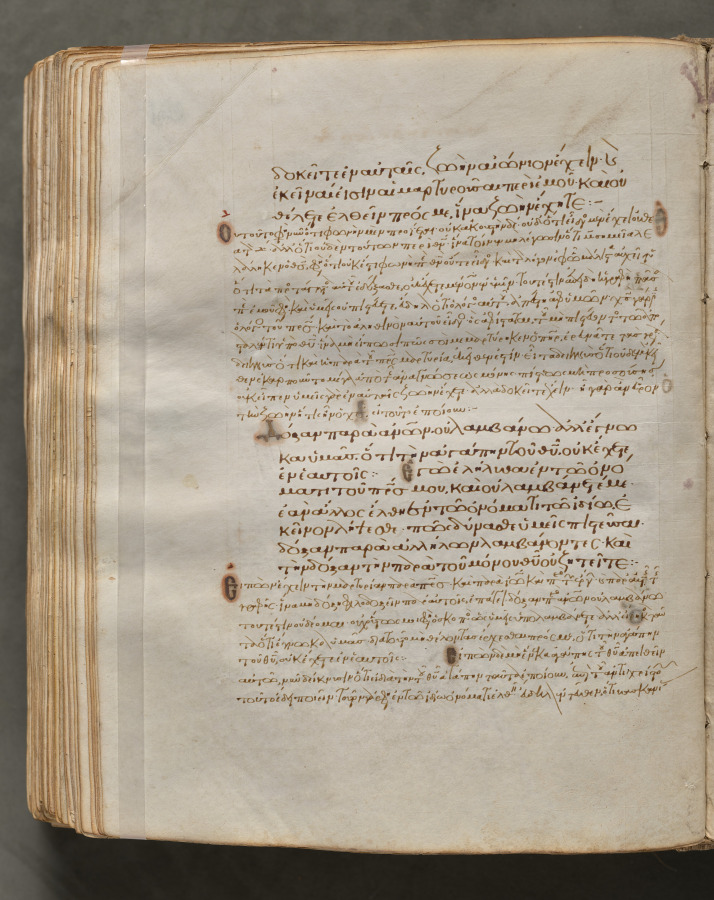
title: Text, folio 347 (verso), from a Gospel Book with Commentaries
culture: Byzantium, Constantinople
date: c. 1000–1100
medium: ink, tempera, and gold on vellum; leather binding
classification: Bound Volume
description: Each of the four gospels in this book opens on a page with brilliantly illuminated borders depicting the author of the text as well as birds—principally peacocks, symbols of the immortality of the soul—and fountains, representing the fountain of life and the salvation of the soul. This volume consists of 428 leaves with texts in Greek. Its level of sophistication suggests that it was probably written and decorated in a monastery in Constantinople.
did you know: Gospel books were carried in procession through Byzantine churches.